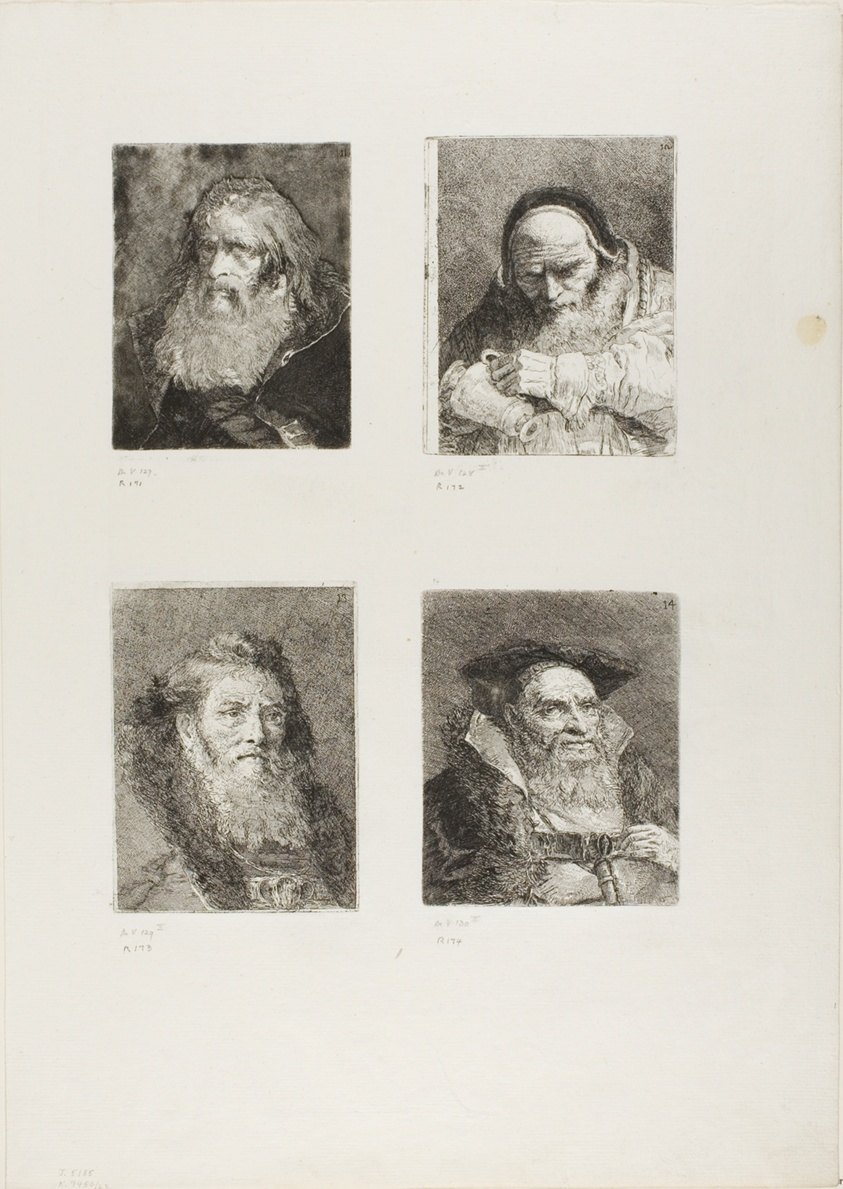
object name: Print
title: Old Man with a Bare Head, A Pope with a Jug, Old Man with a Bare Head, Old Man with a Beard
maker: Giovanni Domenico Tiepolo (Italian, 1727-1804)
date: 1775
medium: Four etchings on ivory laid paper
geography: Italy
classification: etching; print; prints and drawing